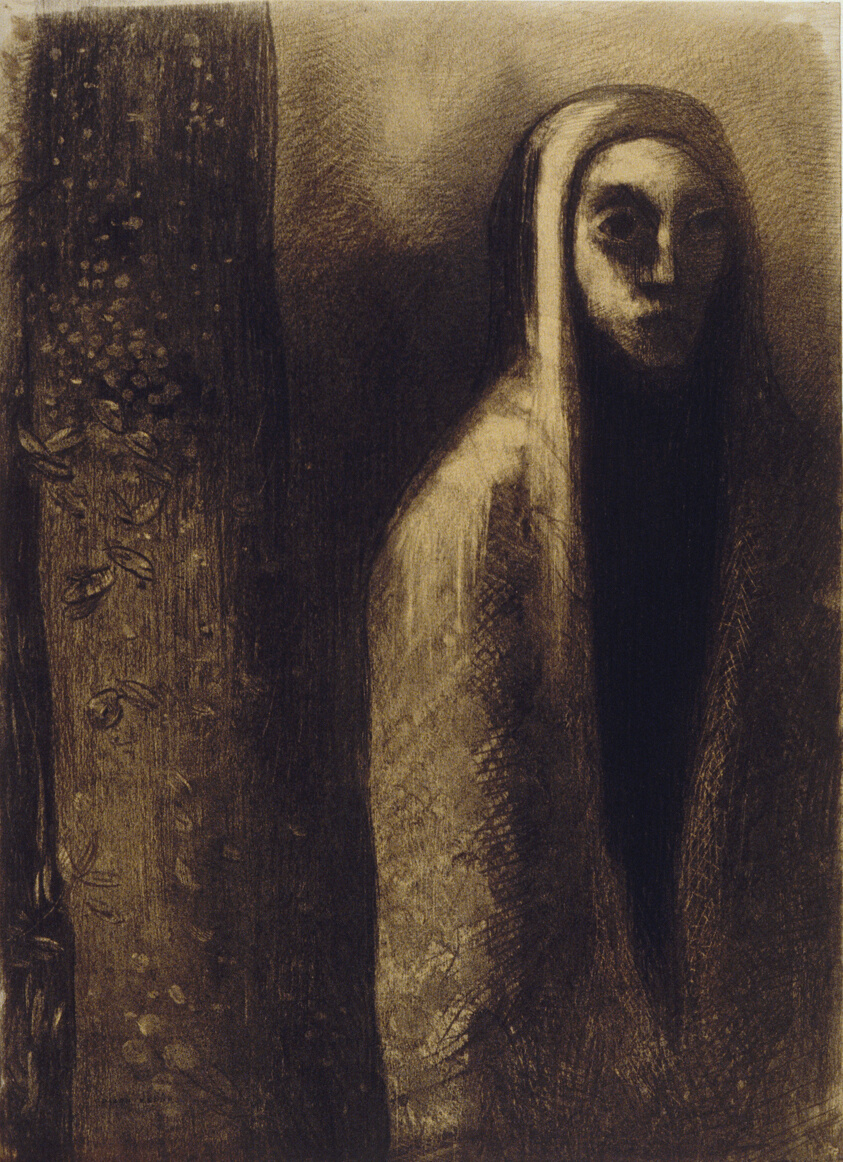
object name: Drawing and Watercolor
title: Prophète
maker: Odilon Redon (French, 1840-1916)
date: c. 1885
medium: Black and brown charcoal with black chalk, stumping, scraping and erasing, on ivory wove paper (discolored to cream)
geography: France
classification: charcoal; drawings (visual works); prints and drawing; paper